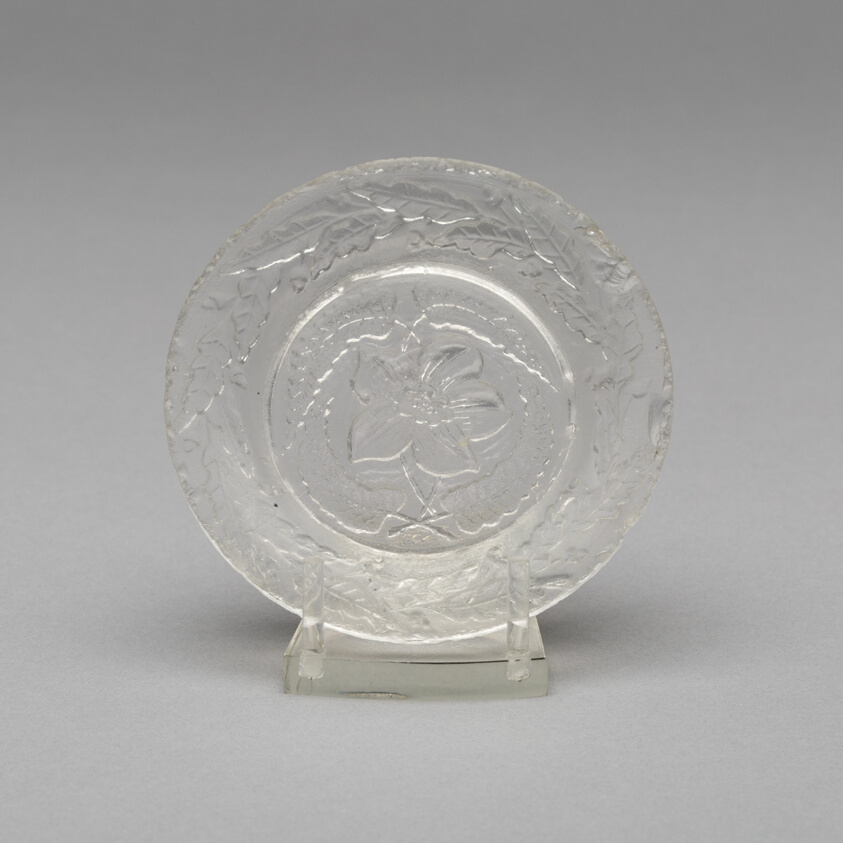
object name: Glass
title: Cup plate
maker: Artist unknown (American, 19th century)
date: c. 1835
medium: Pressed glass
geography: United States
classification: plate (general, dish); glass; american decorative arts; american arts; decorative arts